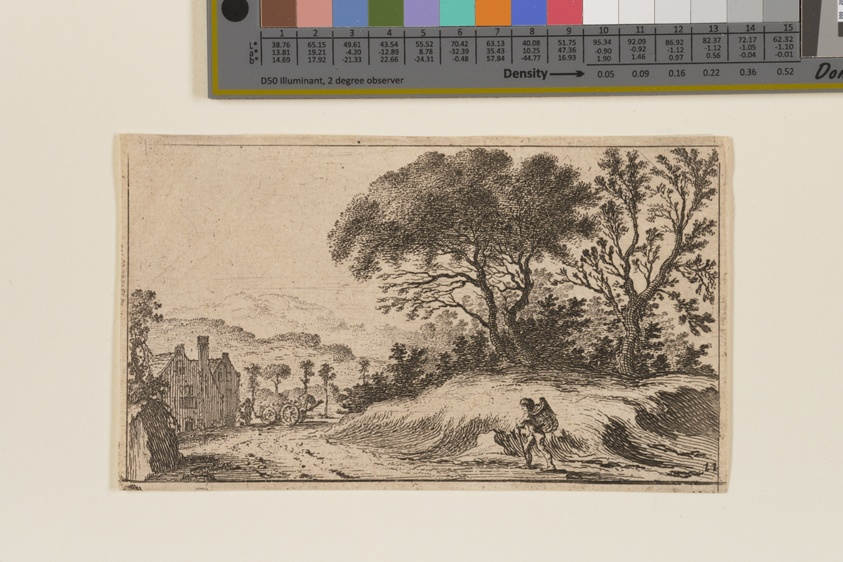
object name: Print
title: Traveler on a Path before Three Trees on a Knoll at Right, from Twelve Landscapes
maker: Gillis van Scheyndel (Dutch, 1595–1660)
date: c. 1605-1650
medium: Etching on ivory laid paper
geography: Netherlands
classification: etching; paper; print; prints and drawing